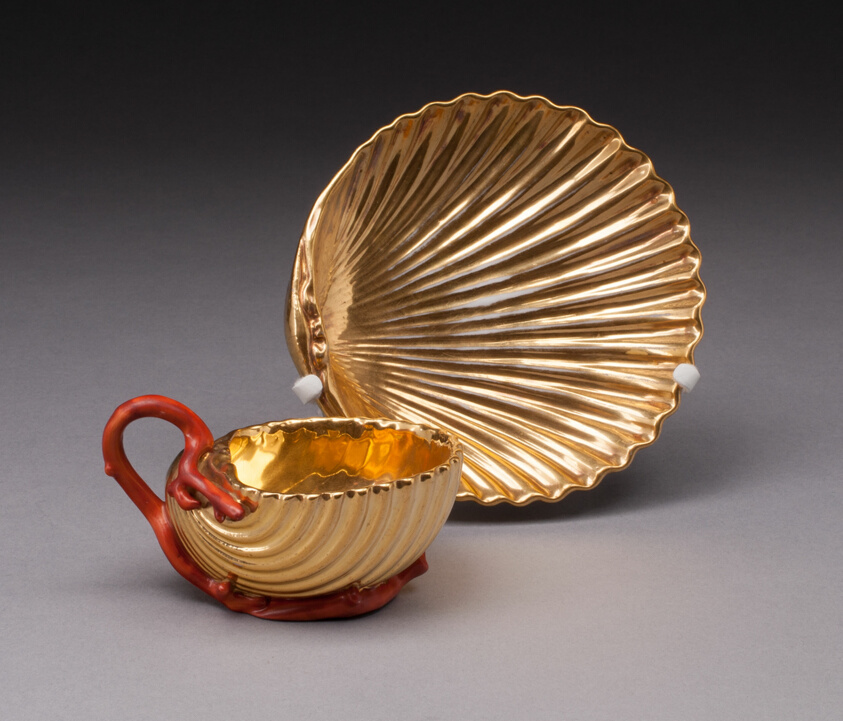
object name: Ceramics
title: Cup and Saucer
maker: Dagoty Porcelain Factory (French, 1800–1820); Paris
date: 1810–15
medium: Hard-paste porcelain, enamel, and gilding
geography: Paris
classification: drinking vessel; european decorative arts; ceramics